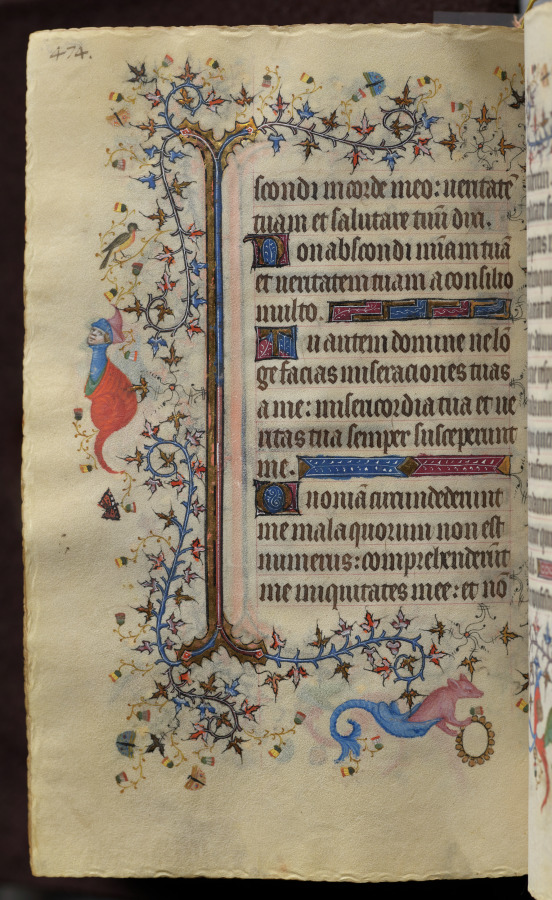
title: Hours of Charles the Noble, King of Navarre (1361-1425): fol. 231v, Text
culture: France, Paris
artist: Master of the Brussels Initials and Associates (French)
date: c. 1405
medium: ink, tempera, and gold on vellum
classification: Bound Volume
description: This precious volume was obviously highly prized by its owner, the French-born King of Navarre, who had his coat of arms painted on no less than twenty folios. Rather than directly commissioning this manuscript from a specific workshop, it seems that Charles the Noble acquired his book of hours -- perhaps ready-made for the luxury market -- while on a trip to Paris in 1404-05. A collaborative effort, six painting styles are evidenced within the pages of this codex, those of two Italians, two Frenchmen, and two Netherlanders. The painter who was responsible for the planning and decoration of the book, and who produced seventeen of the large miniatures, was a Bolognese artist known as the Master of the Brussels Initials. His principal assistant, responsible for most of the borders, was a Florentine who signed his name "Zecho" da Firenze on folio 208 verso.